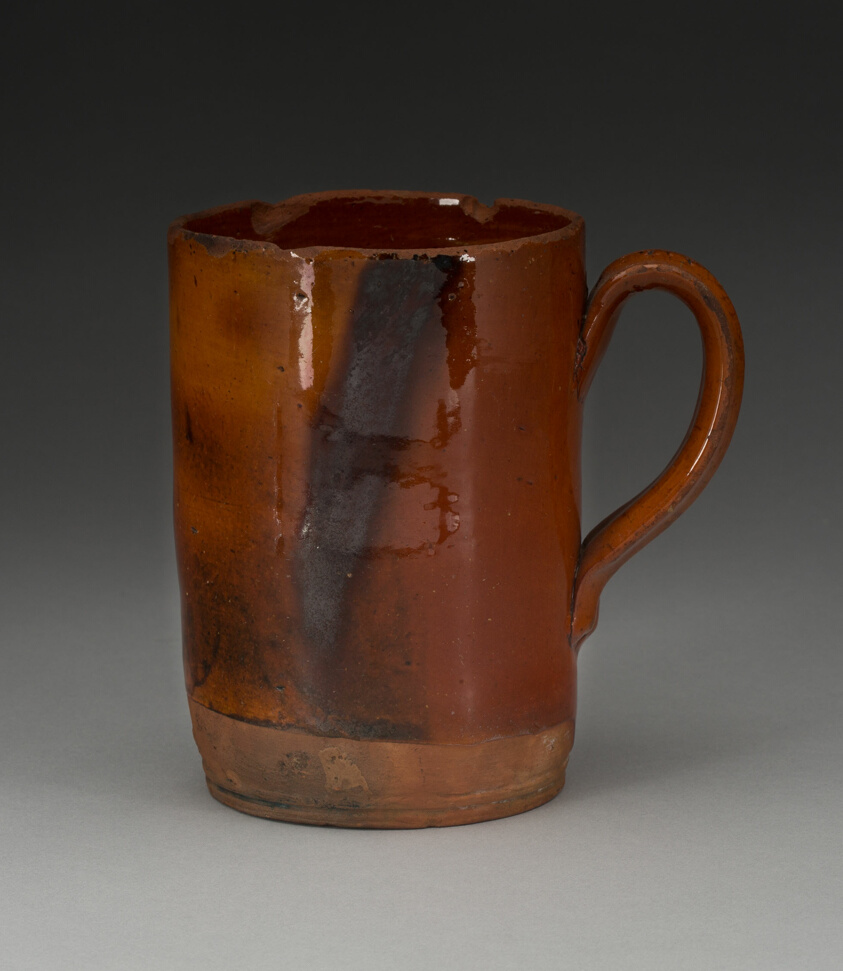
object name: Decorative Arts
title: Mug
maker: Artist unknown (American, 18th–19th century); New England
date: 1790–1840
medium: Redware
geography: New England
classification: drinking vessel; stoneware; ceramics; american decorative arts; american arts; decorative arts